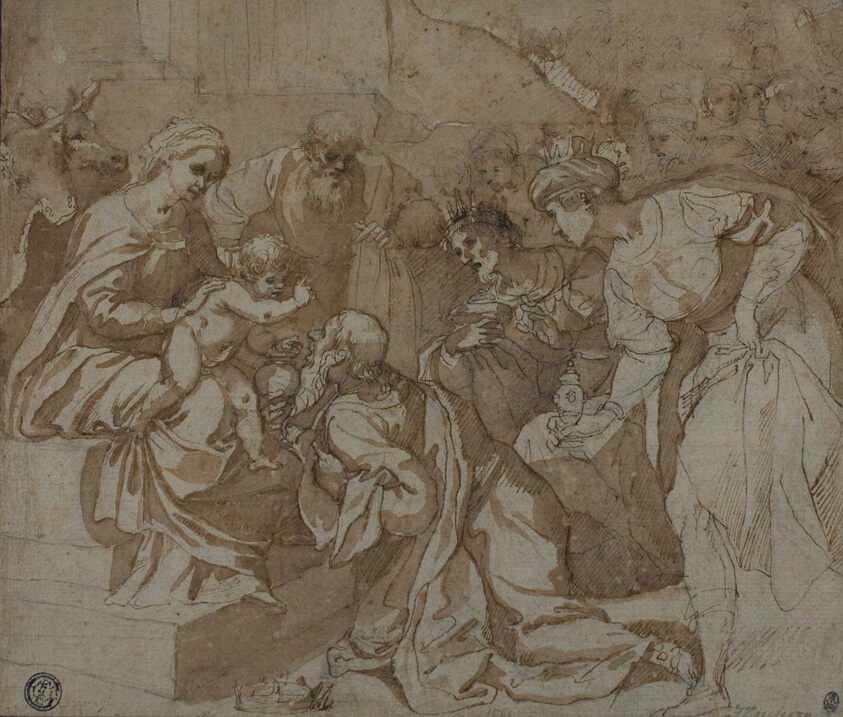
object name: Drawing and Watercolor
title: Adoration of the Magi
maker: Follower of Federico Zuccaro (Italian, 1540/41-1609)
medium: Pen and brown ink and brush and brown wash, with graphite, on cream laid paper, laid down on blue wove paper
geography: Italy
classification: ink and wash; drawings (visual works); prints and drawing